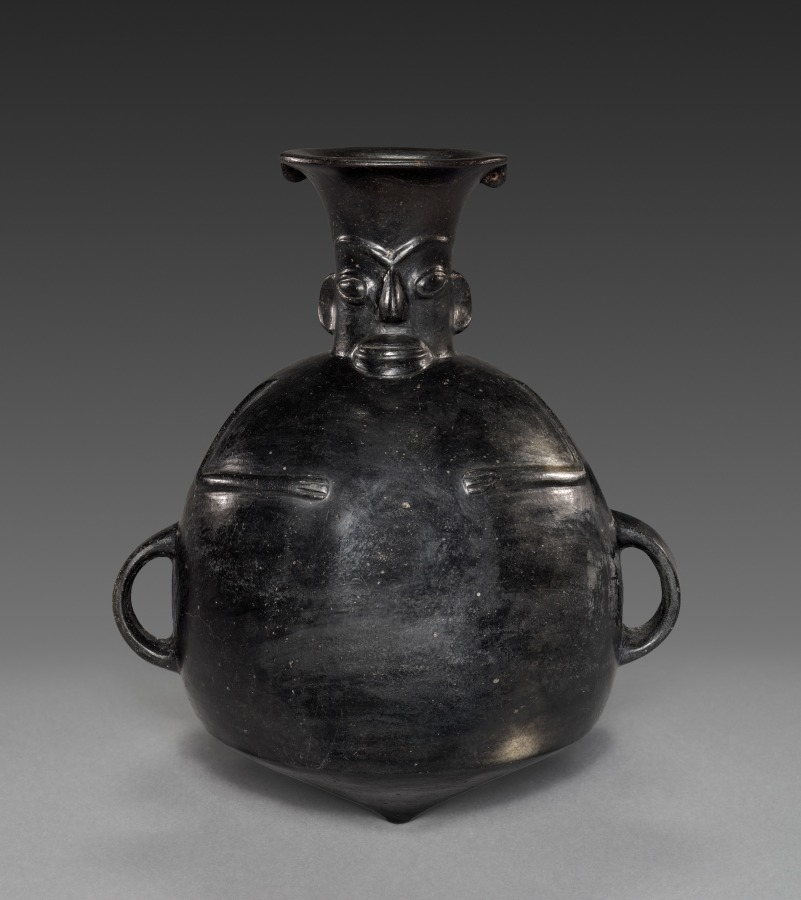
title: Hunchback Vessel (Aryballos)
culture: Central Andes (Peru), Chimú-Inka style, Late Horizon period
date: 1470–1521 (Thermoluminescence date, 1315–1615)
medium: ceramic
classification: Ceramic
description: This handsome vessel, along with the nearby double-chambered vessel, were made on the north coast after the Inka conquered the Chimú in the 1460s. Under Inka rule, many aspects of Chimú ceramic technology continued but new forms and subjects were introduced, such as the aryballos, a classic Inka vessel type. This example takes the form of a hunchback and may refer to the Inka predilection for employing hunchbacks as royal servants.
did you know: Hunchbacks seem to have functioned as servants in Inka royal palaces.